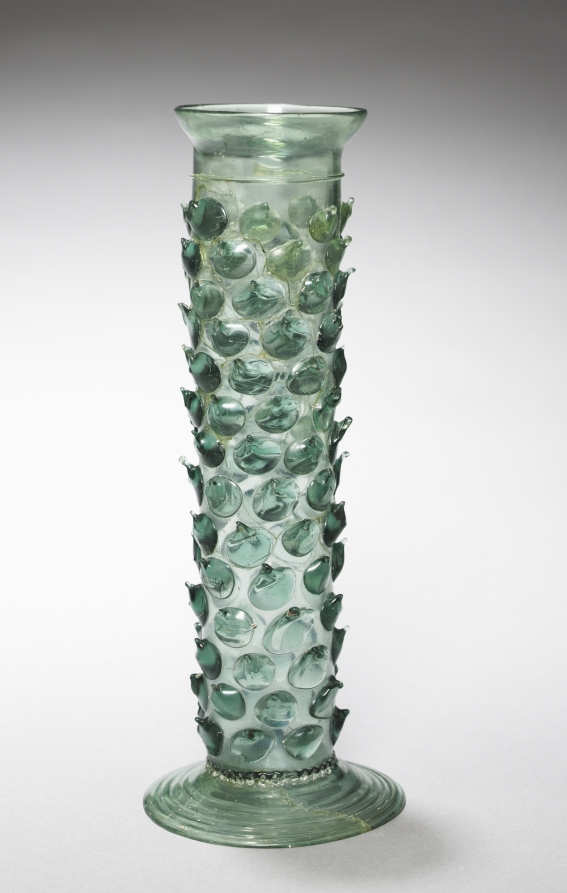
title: Tall Beaker with Prunts (Stangenglas)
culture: Germany, late 15th century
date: late 1400s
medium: green glass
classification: Glass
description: Tall beakers were used for a variety of beverages, but especially wine and beer. They were often passed around during communal drinking on celebratory occasions. This pole glass (stangenglas), characterized by its tall cylindrical structure and pedestal foot, is adorned with prunts, glass blobs that afford a firm grip in the absence of a handle.